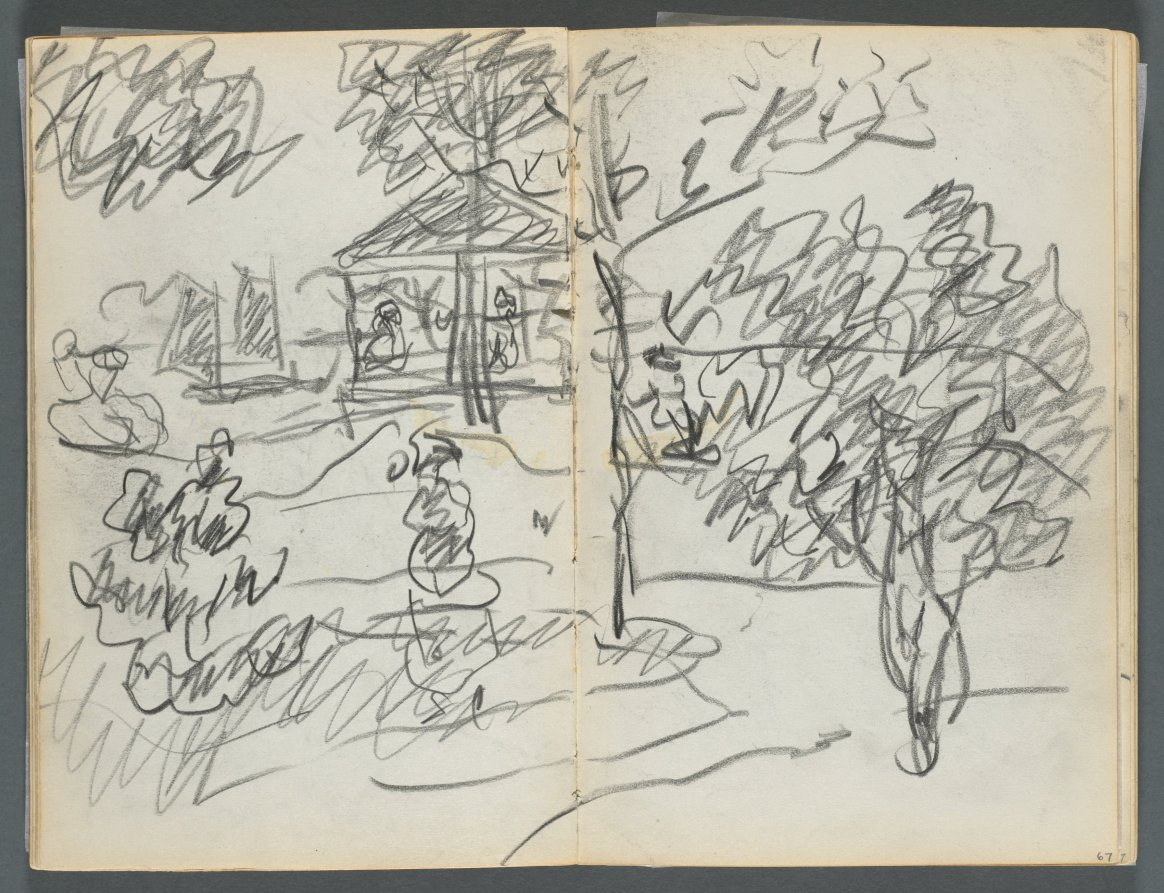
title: Sketchbook, The Dells, N° 127, page 066 & 67: Landscape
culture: America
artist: Maurice Prendergast (American, born Newfoundland [now Canada], 1858–1924)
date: c. 1919–1921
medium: graphite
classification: Bound Volume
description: This sketchbook contains 59 pages of graphite drawings and 16 watercolors made at various locations on Cape Ann, Massachusetts.